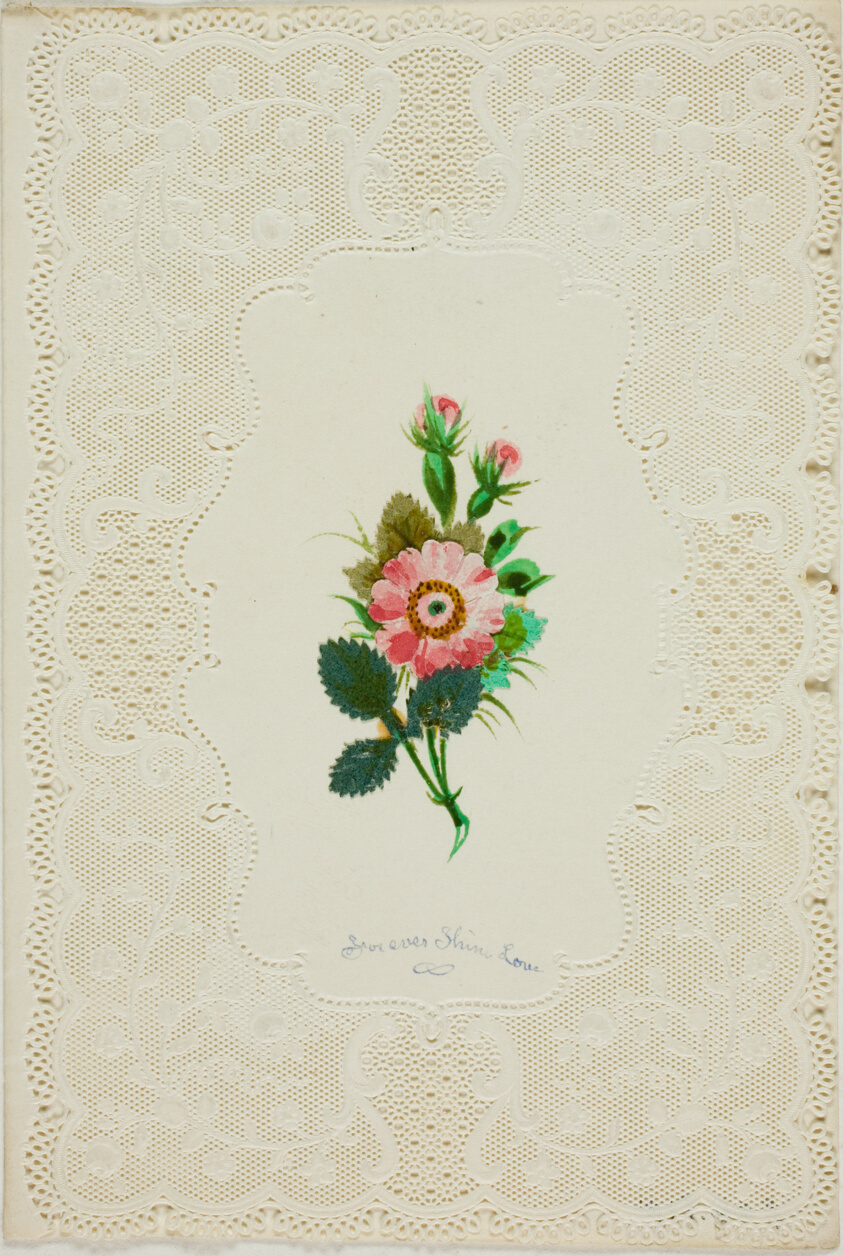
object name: Drawing and Watercolor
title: Forever Thine Love (valentine)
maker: Unknown Artist; English, 19th century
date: c. 1850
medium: Collaged elements and watercolor, with pen and blue ink on cut and embossed ivory wove paper (lace)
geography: England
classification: valentine; prints and drawing; paper